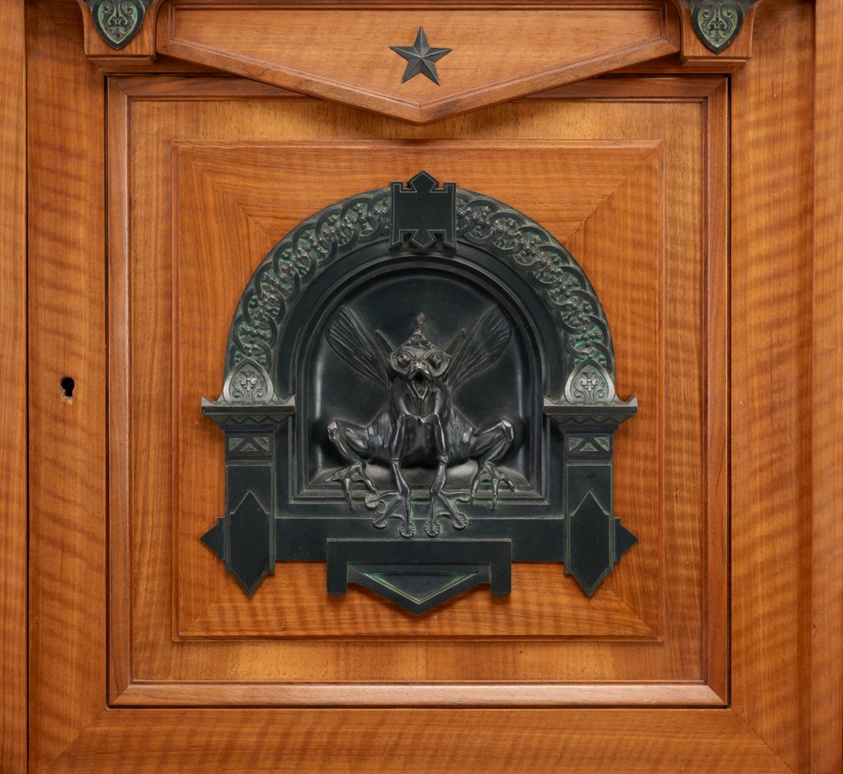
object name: Furniture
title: Cigar Cabinet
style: Neogothique, 19th century, gothic revival, merovingian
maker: Made by Charles-Guillaume Diehl (German, active in Paris, 1811–1885); Designed by Jean-Eugene Brandely (French, active 1867–1873); Bronzes modeled by Emmanuel Fremiet (French, 1824–1910); Paris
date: c. 1867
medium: Oak, cedar and walnut veneers, patinated bronze, and caning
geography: Paris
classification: furniture; humidor; european decorative arts; cabinet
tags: lizards, merovech, merovee, quatrefoil, smoking, cigars, tobacco